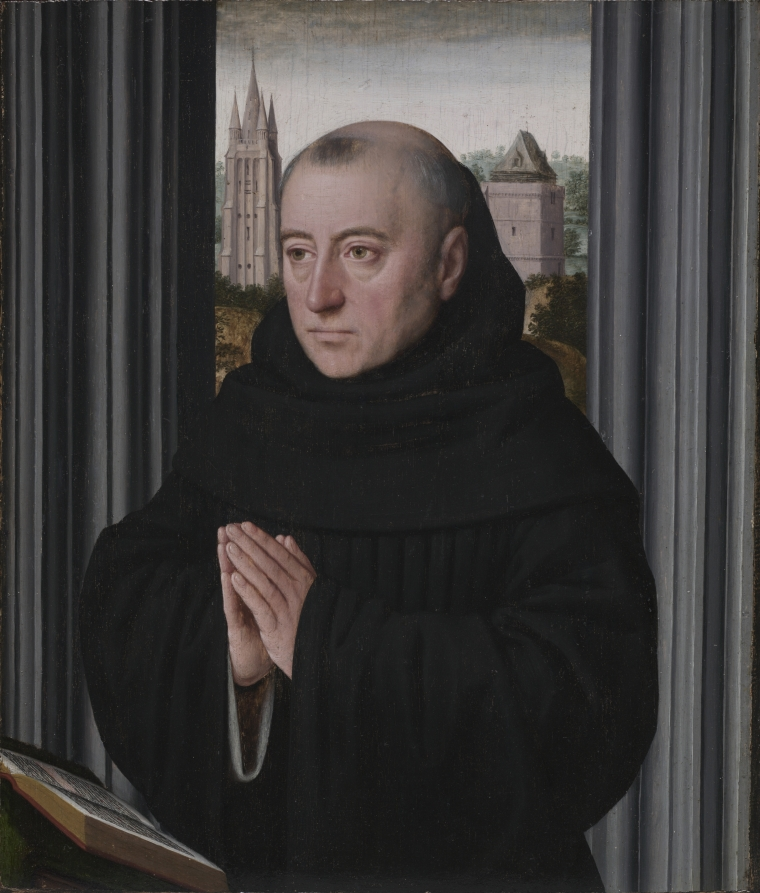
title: Portrait of a Monk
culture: Flanders, Bruges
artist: circle of Gerard David (Netherlandish, 1450/60–1523)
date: early 1500s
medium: oil on wood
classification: Painting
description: This panel originally formed the right half of a diptych, a hinged two-paneled painting used for private worship. The missing left panel probably depicted the Virgin and Child. The entire composition showed the monk, with his prayer book open, kneeling in an interior before Mary and the infant Jesus. This panel is very similar to another painting of a monk now in the National Gallery (London) by Gerard David. Although we do not know the monk's name, he must have lived in the Netherlandish city of Bruges, because behind him appear two of that city's most famous towers: on the left is that of the Onze Lieve Vrouw (Our Dear Lady) Church; the Cathedral of the Saviour is on the right. Also, his simple gray garment and tonsure indicate that he likely belonged to an Augustinian religious community.